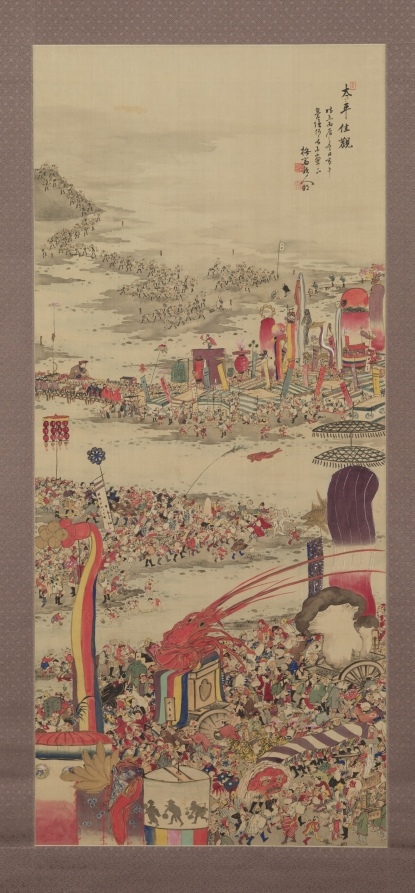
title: The Sand-Carrying Festival (Sunamochi Matsuri)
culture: Japan, Edo period (1615–1868)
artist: Sakai Basai (Japanese, dates unknown)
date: 1856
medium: hanging scroll; ink and color on silk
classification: Painting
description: Dredging waterways to preserve their function once required the cooperation of large numbers of people, seen at the top of this painting. Sand-carrying festivals were historically associated with religious rites or gathering alms to construct places of worship, and involved not only the labor of collecting sand from rivers but also parades and performances marking the event. Kyoto’s Kamo River has been dredged many times over the centuries, including in 1856, the year this image was made. Although the title at the upper right says Taihei Kakan, or “Peaceful, Beautiful View,” the painter’s delightful scene reminds his audience that at the best of times, peace may have little to do with quiet. Sakai Baisai was a student of literati painter Yamamoto Baiitsu (1783–1856). He was active until around 1879, when he relocated to Kobe to make his living as a design painter on porcelains destined for export.